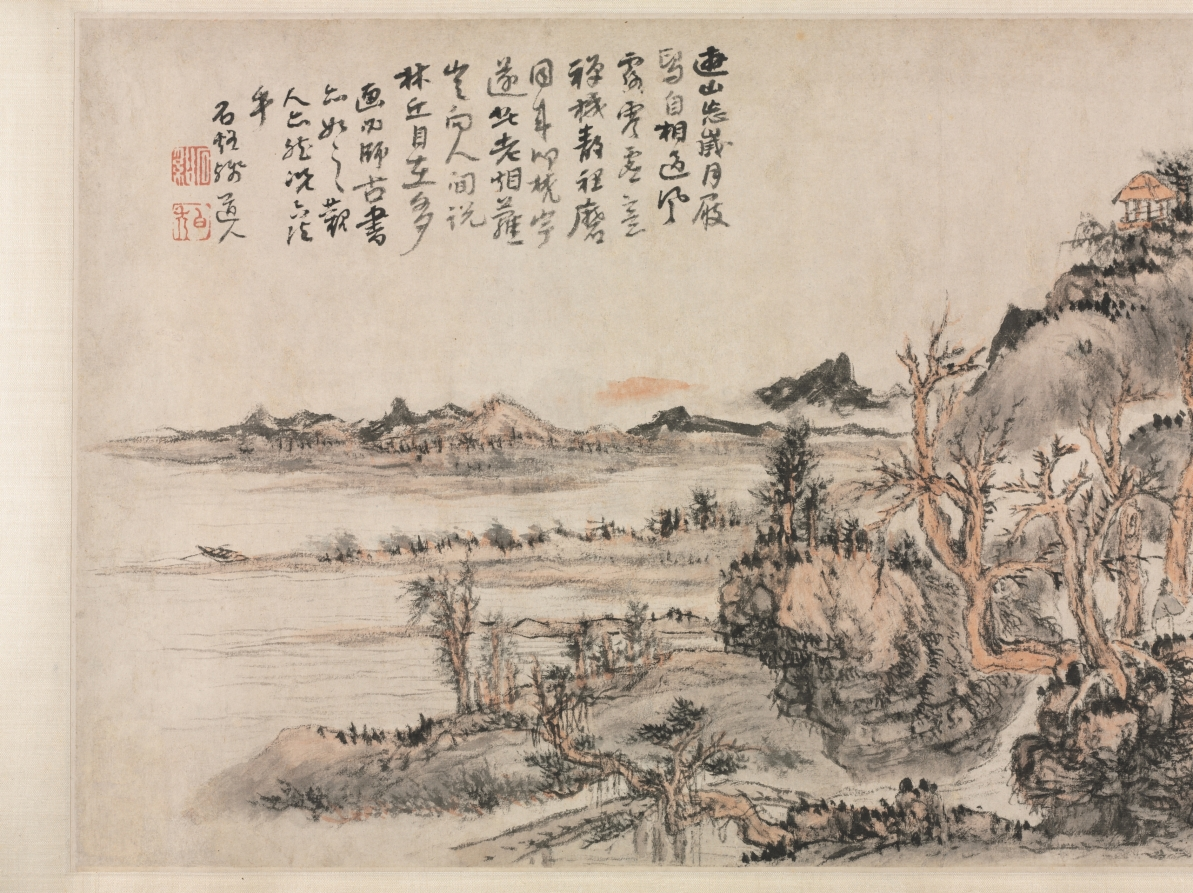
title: Spring Landscape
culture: China, Qing dynasty (1644–1911)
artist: Kuncan (Chinese, 1612–c. 1673)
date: 1666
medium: double album leaf mounted as a handscroll; ink and color on paper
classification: Painting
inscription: 遊山忘歲月，屐舄自相過。 風露寒虚意，禪機靜裡磨。 同年叩梵宇，遂此老煙蘿。 豈向人間說，林丘自在多。 畫必師古，書亦如之。觀人亦然，况六法乎。石谿殘道人 印二：石谿，白秃。另有「介丘」一印在右邊。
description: One of the acclaimed "Four Monks" (the other three being Zhu Da, Daoji, and Hongren), Kuncan was known for the rough and rustic style of his landscape paintings. This painting was once part of a large album, painted at the request of his friend Cheng Zhengkui (active 1630–74), with whom he shared a common interest in painting and poetry. The inscription contains a poem, which reads: Wandering through mountains and oblivious of time, We met in casual shoes (and attires). The wind and dew drops harbor a chilling emptiness. Only with patience and silence can the Chan inspiration come. . . .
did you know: This spring scene was once accompanied by album leaves of summer (now in the Museum für Asiatiche Kunst, Berlin) and autumn and winter (now in the British Museum).